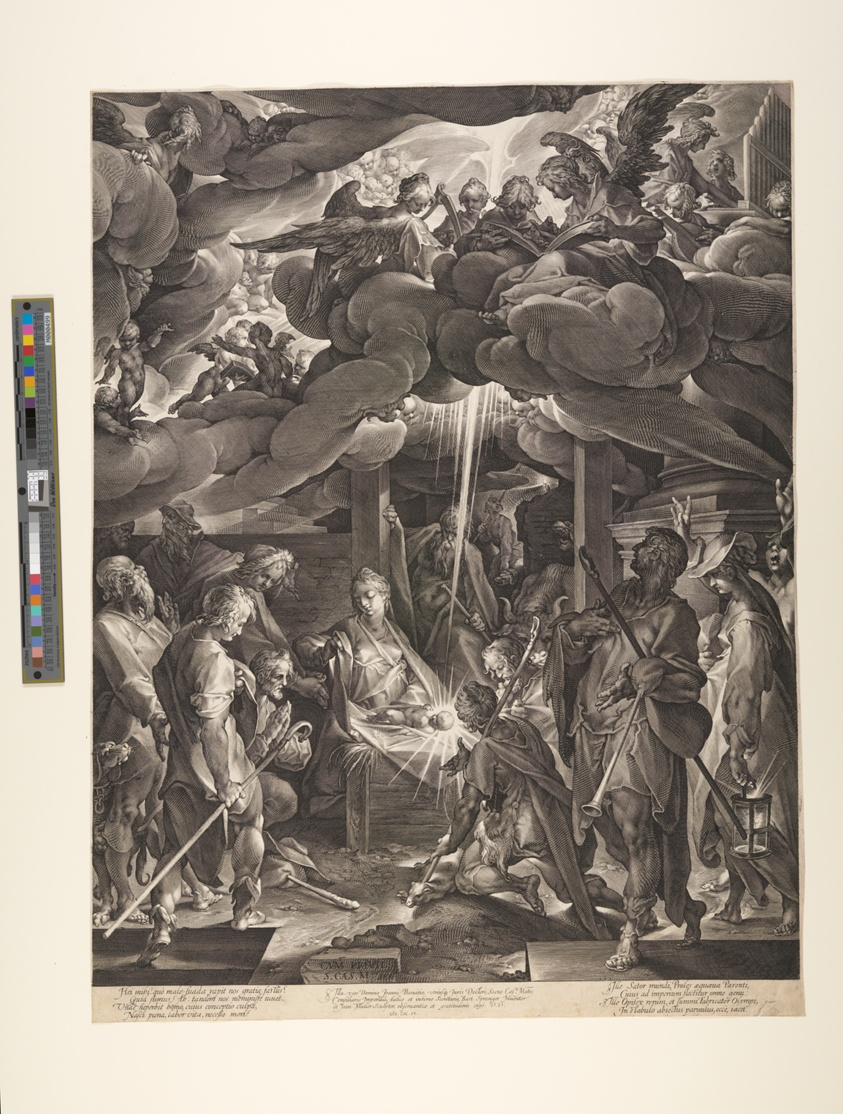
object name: Print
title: Adoration of the Shepherds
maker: Jan Harmensz Muller (Dutch, 1571–1628); Bartholomeus Spranger (Flemish, 1546–1611)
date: 1606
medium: Engraving on ivory laid paper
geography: Netherlands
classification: engraving; paper; print; prints and drawing